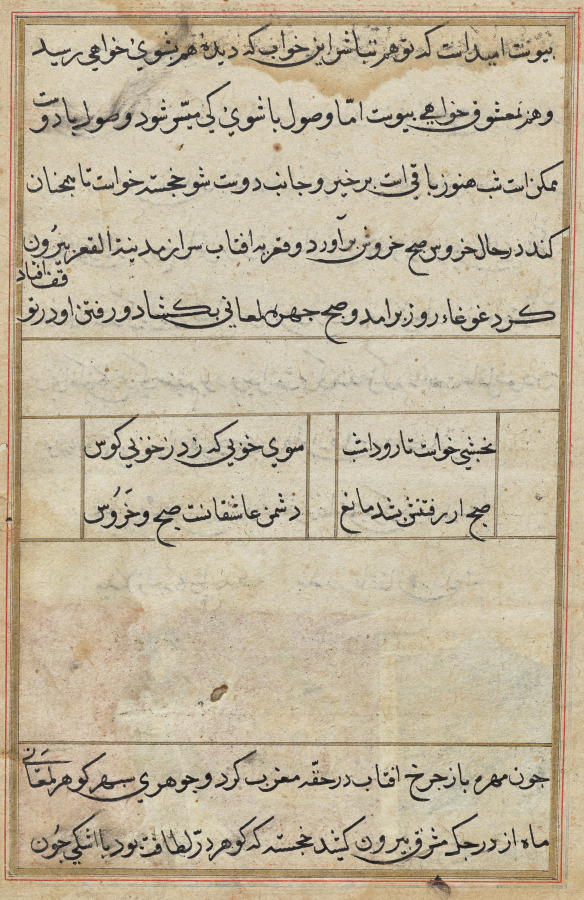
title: Page from Tales of a Parrot (Tuti-nama): text page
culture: Mughal India, court of Akbar (reigned 1556–1605)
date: c. 1560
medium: gum tempera, ink, and gold on paper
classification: Painting